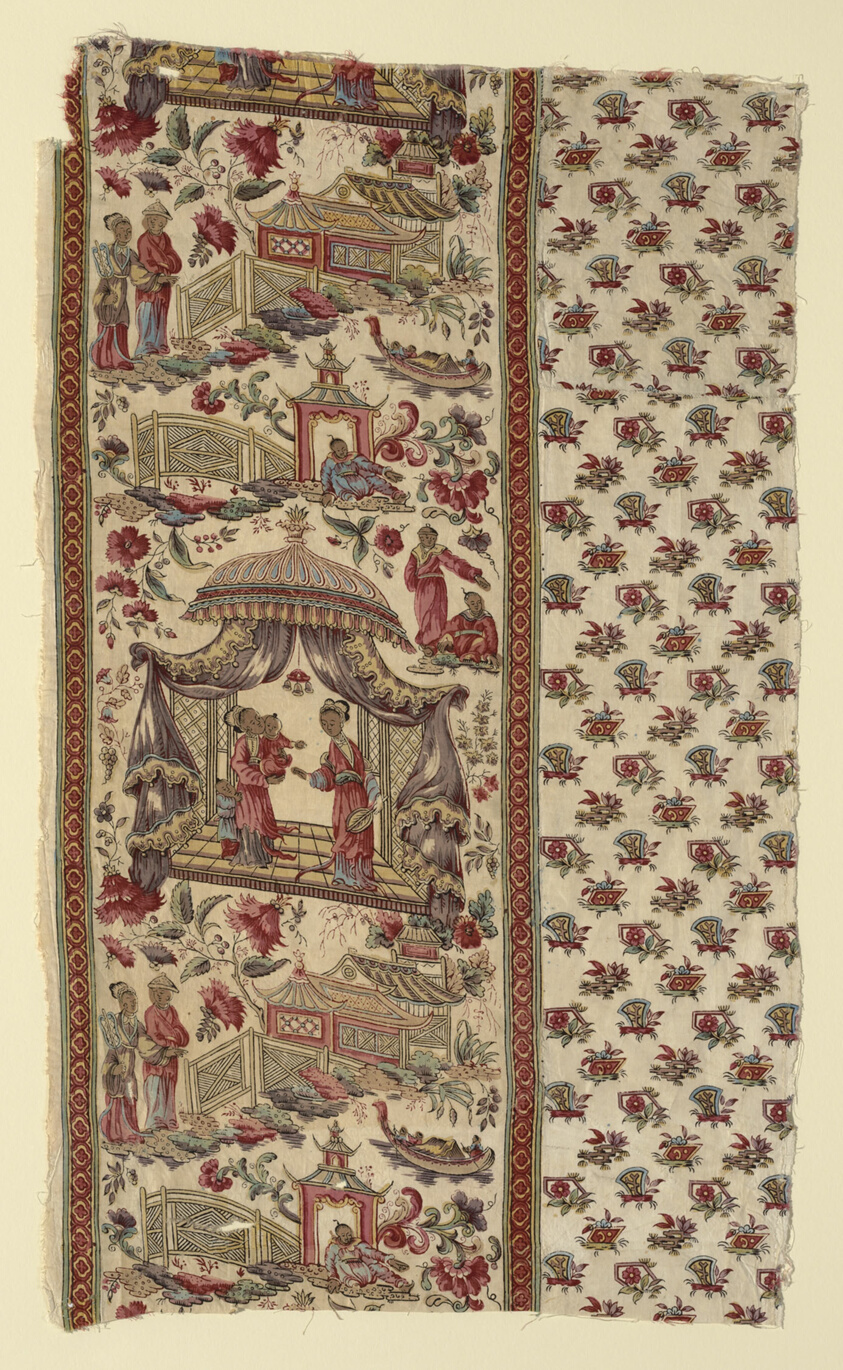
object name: Textile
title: Fragment (Furnishing Fabric)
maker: Designed by J.J. Pearman (English, active c. 1900-1925); Manufactured by Bannister Hall Print Works (English, 1798-1893); England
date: c. 1806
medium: Cotton, plain weave; block printed and painted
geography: England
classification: textile; weaving - printed; weaving; furnishing textile